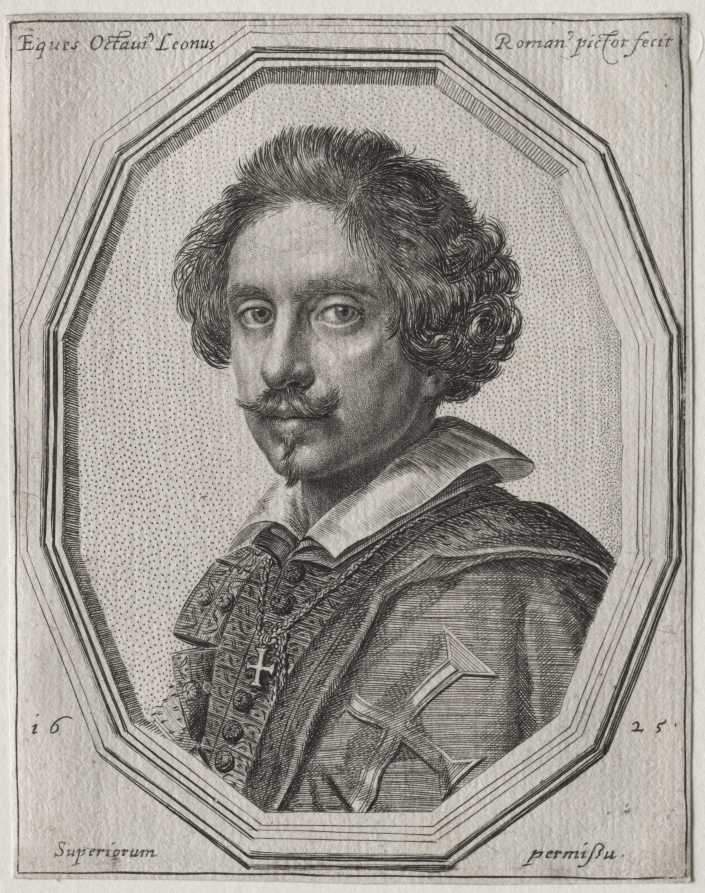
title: Self-Portrait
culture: Italy, 17th century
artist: Ottavio Mario Leoni (Italian, 1578–1630)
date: 1625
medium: engraving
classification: Print